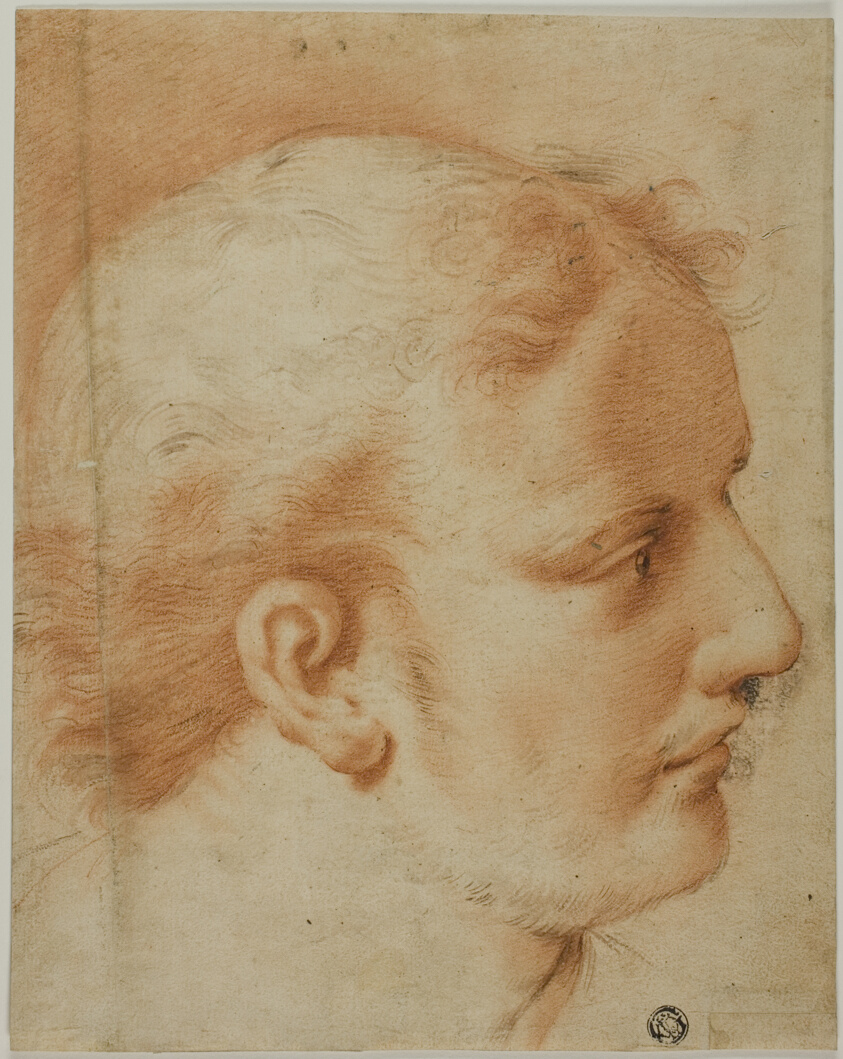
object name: Drawing and Watercolor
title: Head of Young Man, in Profile to Right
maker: Style of Benedetto Luti (Italian, 1666-1724)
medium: Red chalk, with brush and brown wash, on cream laid paper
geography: Italy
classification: chalk; drawings (visual works); prints and drawing